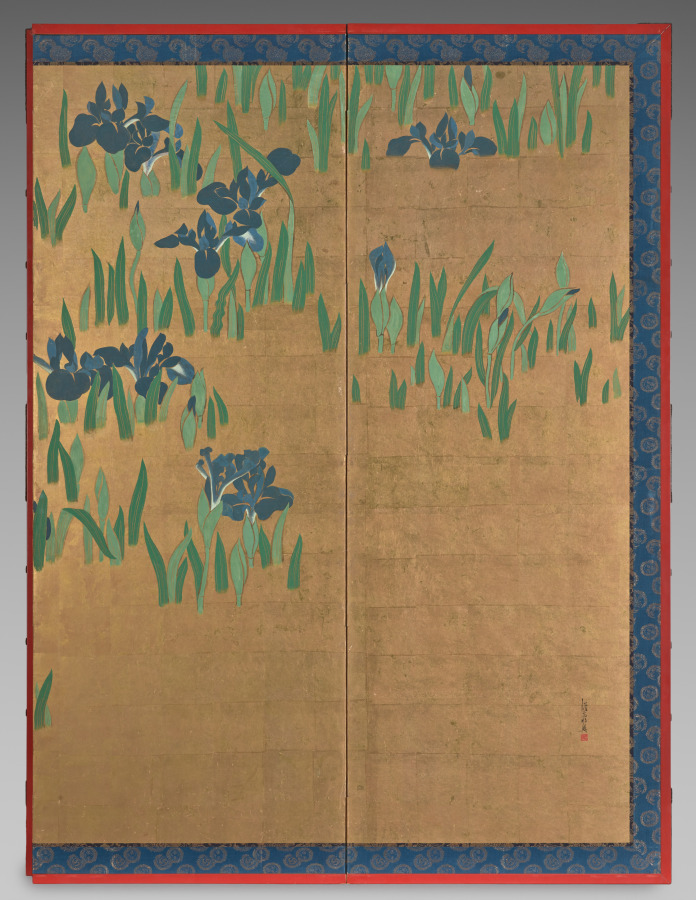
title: Irises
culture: Japan, Edo period (1615–1868)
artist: Watanabe Shikō (Japanese, 1683–1755)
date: 1700s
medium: One of a pair of six-panel folding screens, ink and color on gilded paper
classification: Painting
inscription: signed and sealed lower left of the first panel from the left.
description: The subject of this painting comes from a 10th-century text. It tells of a young nobleman’s journey into the lonely countryside, far from the capital city of Heian-kyō (Kyoto). There he came upon a small stream, the banks of which were covered with blooming irises, on which the artist has chosen to focus our attention. While viewing the beautiful flowers the nobleman composed a poem: I have a beloved wife, Familiar as the skirt of a well-worn robe, And so this distant journeying Fills my heart with grief.